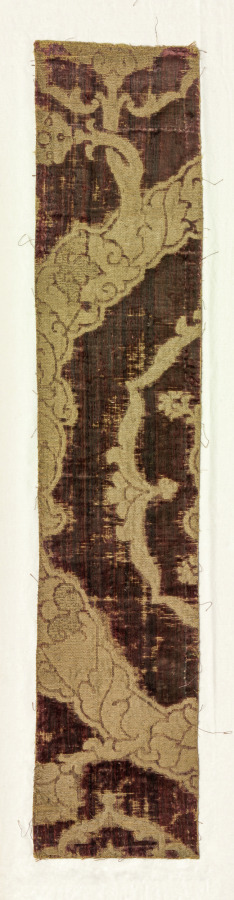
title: Fragments from Chasuble Front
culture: Italy, early 16th century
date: early 1500s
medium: velvet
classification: Velvet